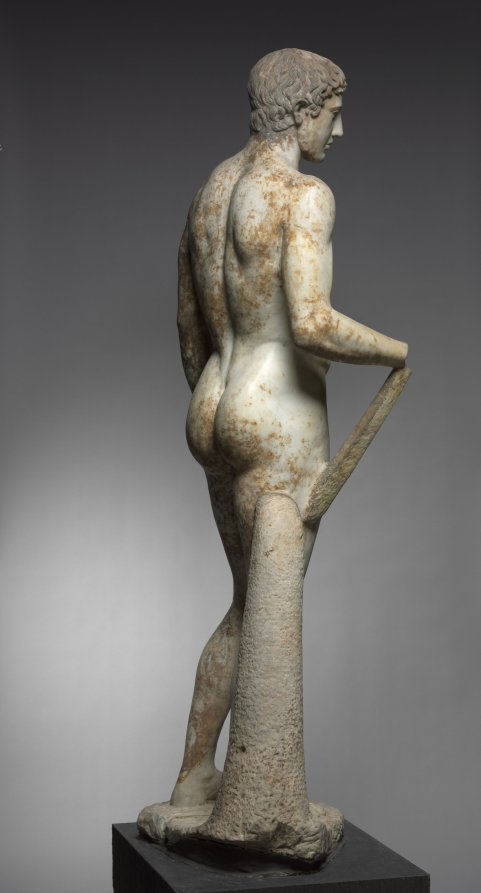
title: Statue of an Athlete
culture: Italy, Roman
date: 1–100 CE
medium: marble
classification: Sculpture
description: This idealized athlete recalls Greek sculptural types invented and popularized during the 400s BC. Large-scale athletes and other sculptures like this were originally created by famous artists as sanctuary dedications. Centuries later, they were widely copied and adapted by Roman sculptors, whose clients sought their own versions of earlier masterpieces. Working in marble rather than bronze, these sculptors added certain elements for stability, such as the struts and the large tree trunk beside the right leg here. Sculptures like this one are profoundly complex, made by and for Romans but descended from Greek ancestors.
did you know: For many years, this sculpture stood in the rotunda of the Cleveland Museum of Art.